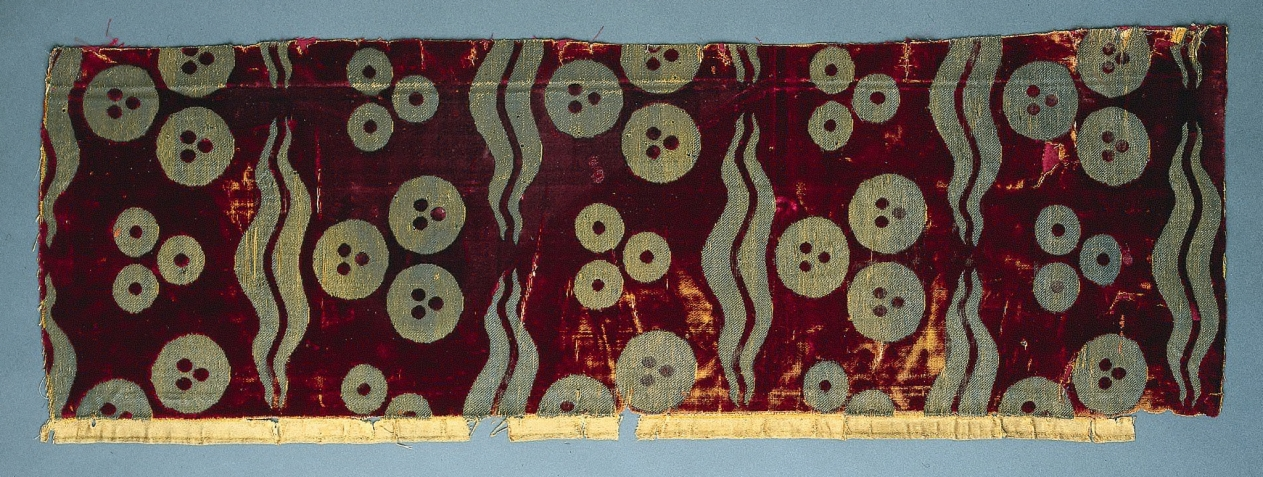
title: Brocaded velvet with chintamani design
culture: Turkey, Bursa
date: late 1400s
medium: velvet, brocaded: silk and silver-metal thread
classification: Velvet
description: This early Ottoman brocaded velvet was woven in an imperial workshop in the prosperous city of Bursa, the silk capital and major commercial center of the Ottoman Empire. It has exceptionally rich crimson silk pile, almost twice as dense as later monochrome velvets. The brocaded pattern of three balls and paired wavy bands is known as chintamani, derived from the Sanskrit word for a popular Buddhist motif, “the three jewels,” shown surrounded by flames or foliage in Buddhist art across Asia. Based on the high frequency of its use in art for the Islamic court of the Ottoman Turks, it appears to have been a favored motif and possibly even an unofficial imperial emblem.